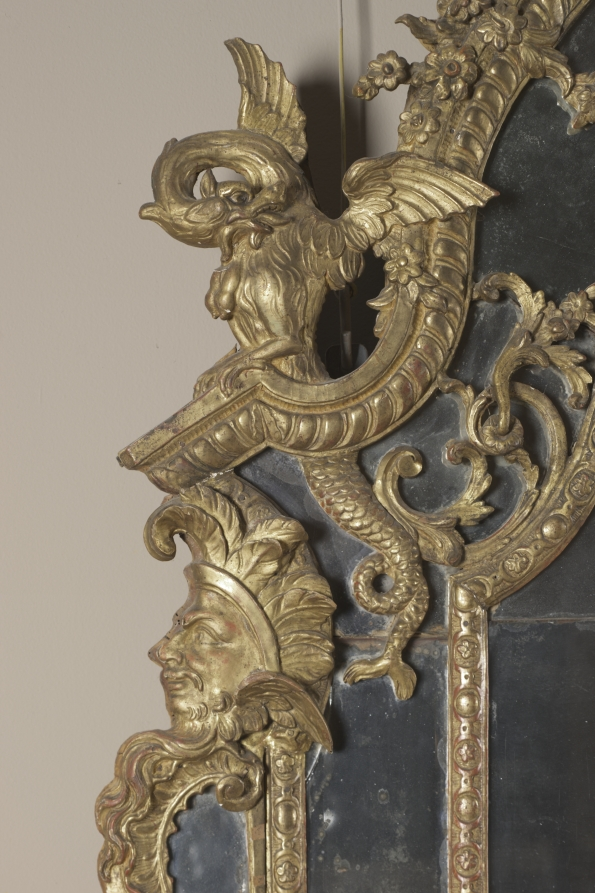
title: Wall Mirror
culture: France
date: c. 1720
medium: carved and gilded wood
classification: Furniture and woodwork